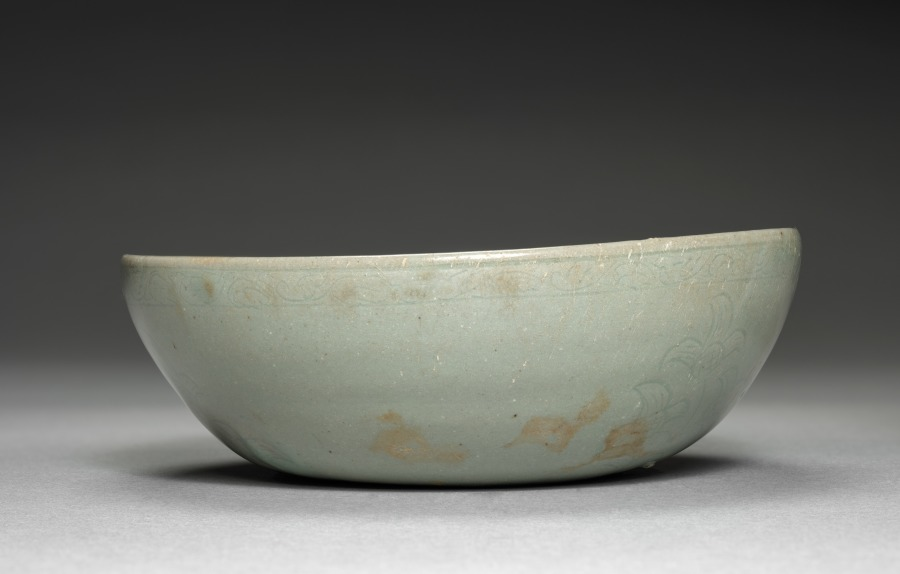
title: Dish with Incised Floral Design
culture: Korea, Goryeo dynasty (918–1392)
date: 1100s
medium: glazed porcelain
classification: Ceramic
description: Celadon wares used for everyday such as this dish were among the most common burial objects in tombs during the Goryeo period (918–1392). Furnishing tombs with an elaborate assemblage of objects was believed to honor and comfort the newly dead. Generally, Goryeo tombs were left untouched until the late 1800s. During the colonial period (1910–45), however, Japanese archaeologists competitively excavated the tombs located in Kaeseong, the former capital of the Goryeo period, and these wares soon became available for Japanese and Western collectors.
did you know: The translucent greenish and bluish glaze of Goryeo celadons, shown in this vase, is the result of distinctive small and long Korean kilns, which maintained a low oxygen saturation with a high level of carbon dioxide.